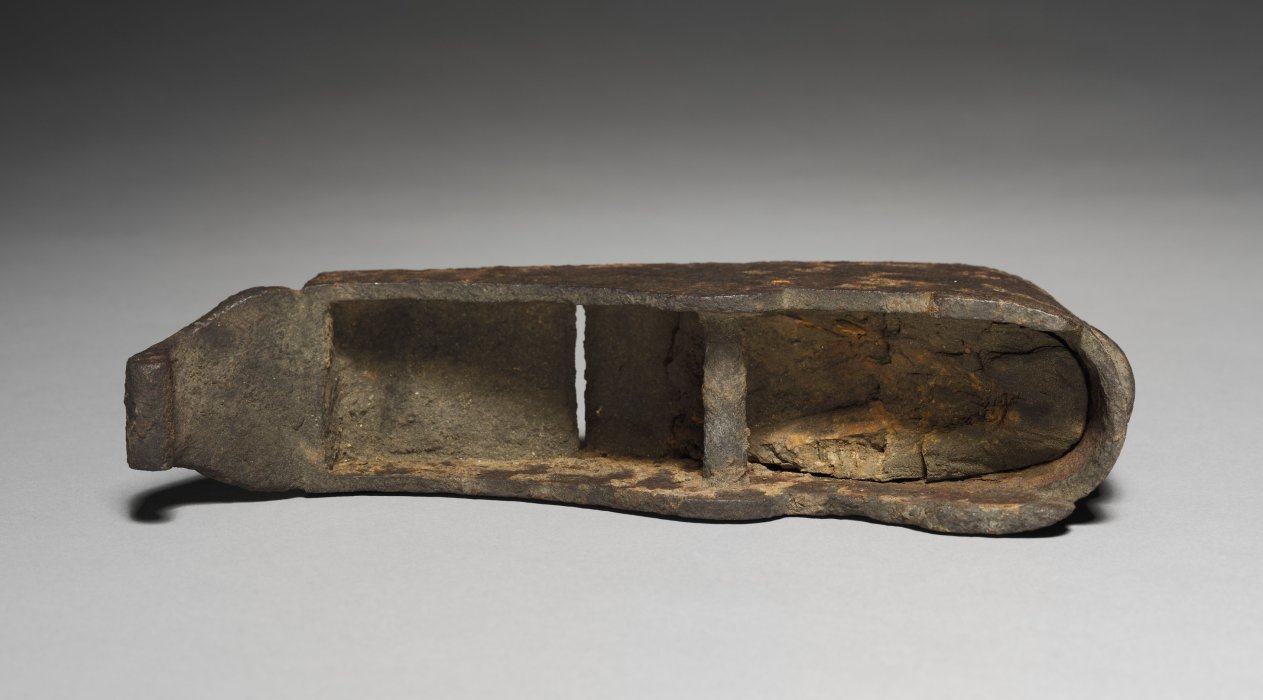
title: Carpenter's Plane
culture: Italy, 15th century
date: 1400s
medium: wood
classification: Tool